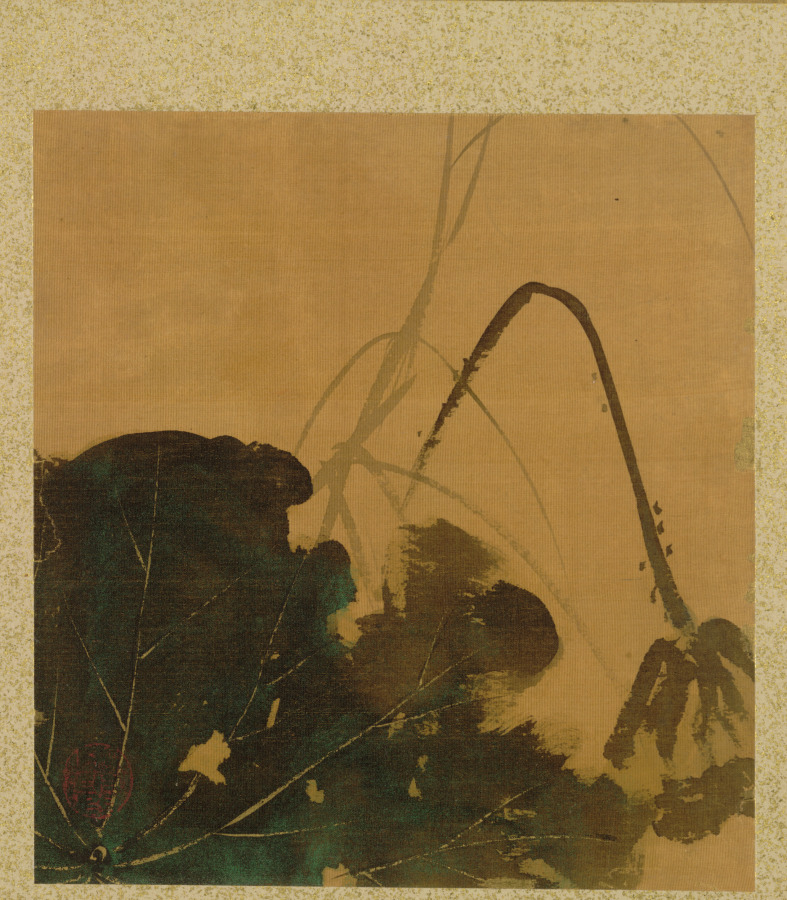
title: Lotus from Album of Paintings by the Venerable Zeshin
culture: Japan, Edo period (1615–1868)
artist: Shibata Zeshin (Japanese, 1807–1891)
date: 1847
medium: leaf in accordion-style album; ink, color, and gold on silk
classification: Bound Volume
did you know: The artist used a wet on wet painting technique called tarashikomi (dripping in) to created the mottled leaf surface.